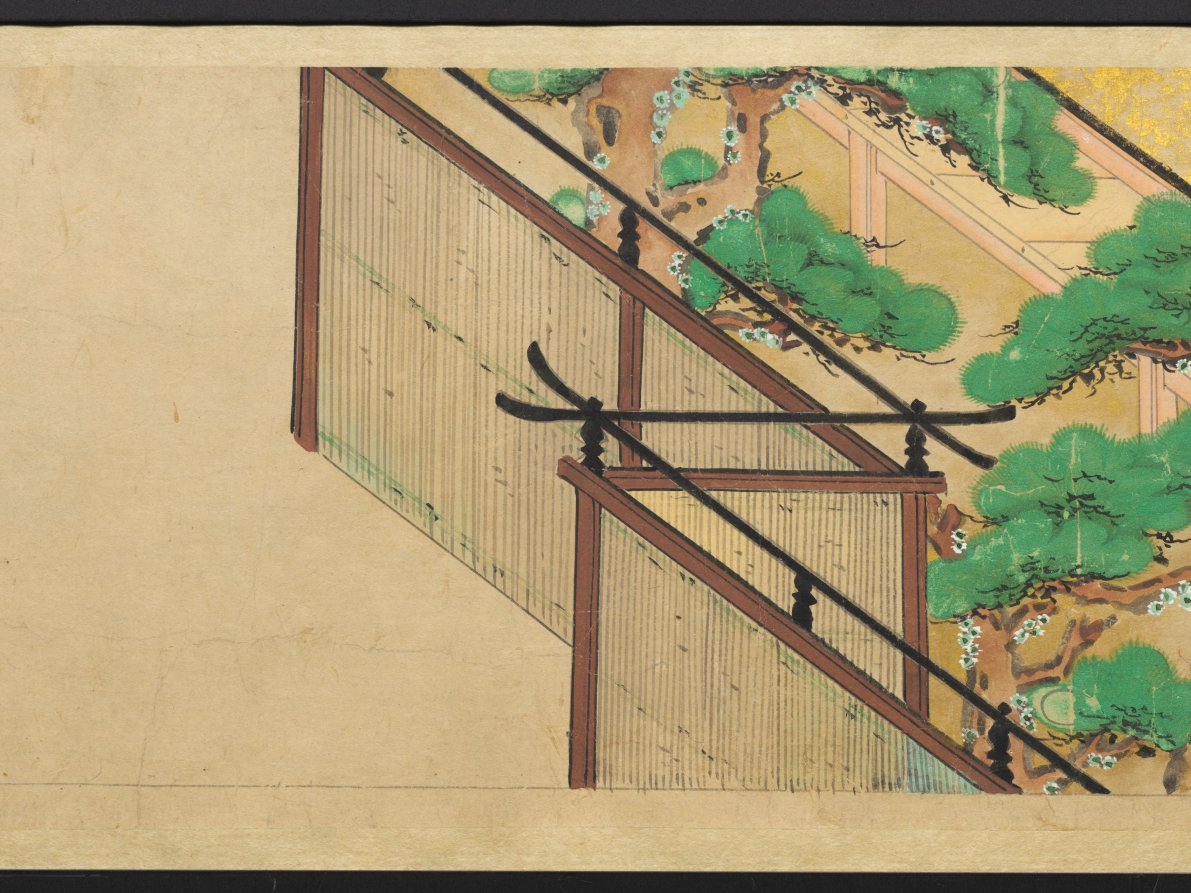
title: The Saltmaker's Story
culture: Japan, Edo period (1615–1868)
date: early 1600s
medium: One of a pair of handscrolls; ink, color, and gold on paper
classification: Painting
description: Once read and copied by girls at New Year’s celebrations and included in dowries, The Saltmaker’s Story is a rags-to-riches tale in which daughters are gifts from the gods. Despite his simple outlook, the main character progresses from humble roots as an associate at Kashima Shrine to the elite status of grandfather of the emperor through the intervention of the Kashima deity. The Saltmaker’s Story is traditionally presented in a set of three scrolls, but the text of this set has been removed by a previous owner, who remounted the illustrations as a pair. The paintings of this one take us from right to left through the first half of the tale.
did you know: This handscroll originally had texts before its paintings, but the texts were removed.